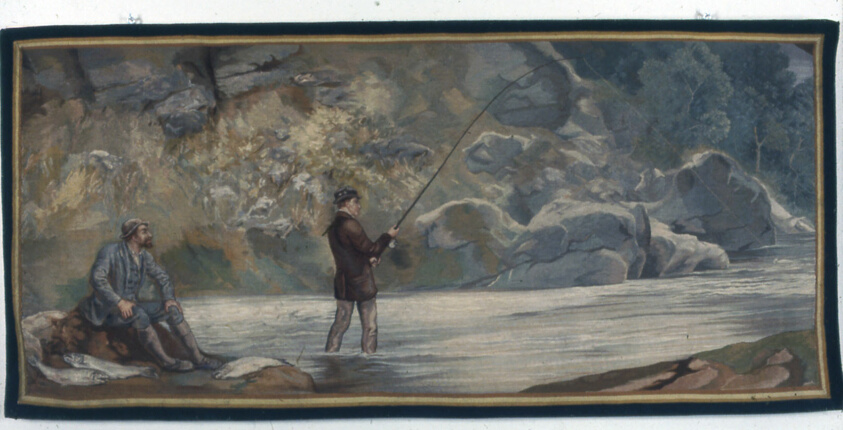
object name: Textile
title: Cornelius Vanderbilt Fishing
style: Modernism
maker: Designed by J.E. Hodgson (English, 1836-1895) after John O'Connor (English, born Ireland, 1830-1889); Manufactured at Royal Windsor Workshop (English, 1876-1890); England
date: 1882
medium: Tapestry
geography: England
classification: weaving - tapestry; weaving; textile